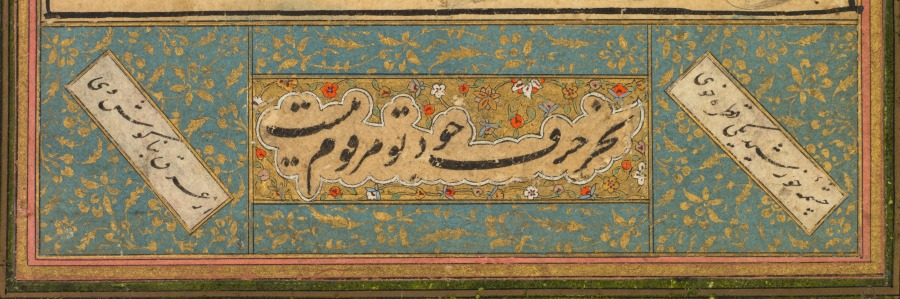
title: A prince riding a composite elephant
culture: India, Golconda, Deccan, 16th century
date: c. 1590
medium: Gum tempera, ink, and gold on paper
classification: Painting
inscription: Inscriptions: Calligraphy of Persian verses in top and bottom borders, in nasta‘liq script: Central verse (half-line on top, the other below the elephant’s feet): Given the foretold lackluster fortune of this abject servant Nothing is writ save words of your bounty Diagonal verses on top: The angelic beauties of paradise with their anxious dark-eyes set on the road Their glances throwing gold coins on the path (as a welcome) Diagonal verses below: The glittering full face of the sun is no more than a single drop From the perspiration behind his ear.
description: A prince sits cross-legged in a covered howdah seat secured to the back of a royal elephant with golden rings on its tusks. The elephant is being driven by attendants, one of whom holds a goad. Artists in the southern Indian region known as the Deccan expanded upon Persian practices of embedding creatures in landscape scenes—like a visual double-entendre—and created inventive images of composite creatures made up of figures that invite extended close looking. This painting would have been mounted in an album that was brought out for entertainment in elite intimate gatherings.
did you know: Two lions share one head at the top of the elephant’s head.